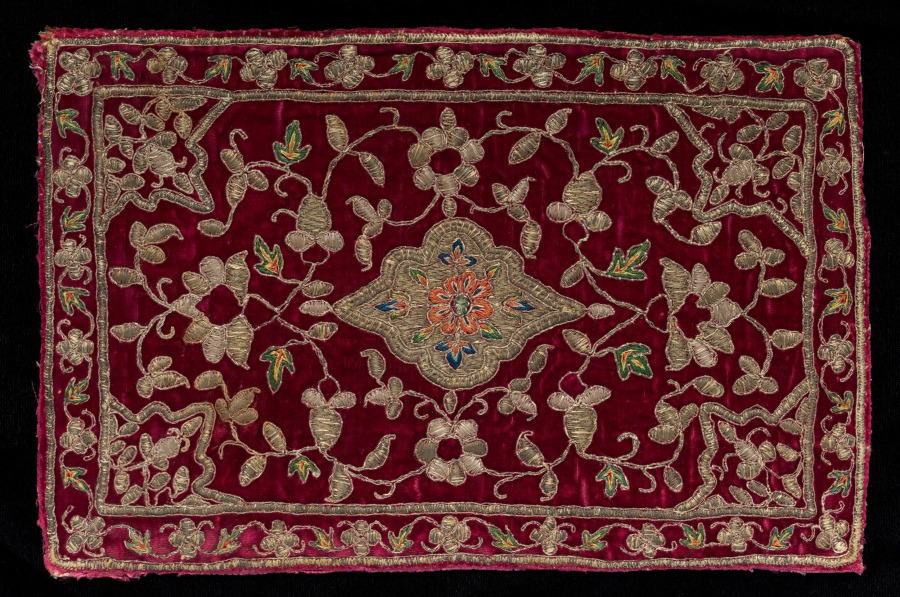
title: Embroidered Panel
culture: India, 18th century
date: 1700s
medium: embroidery; silk and gold and silver filé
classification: Embroidery